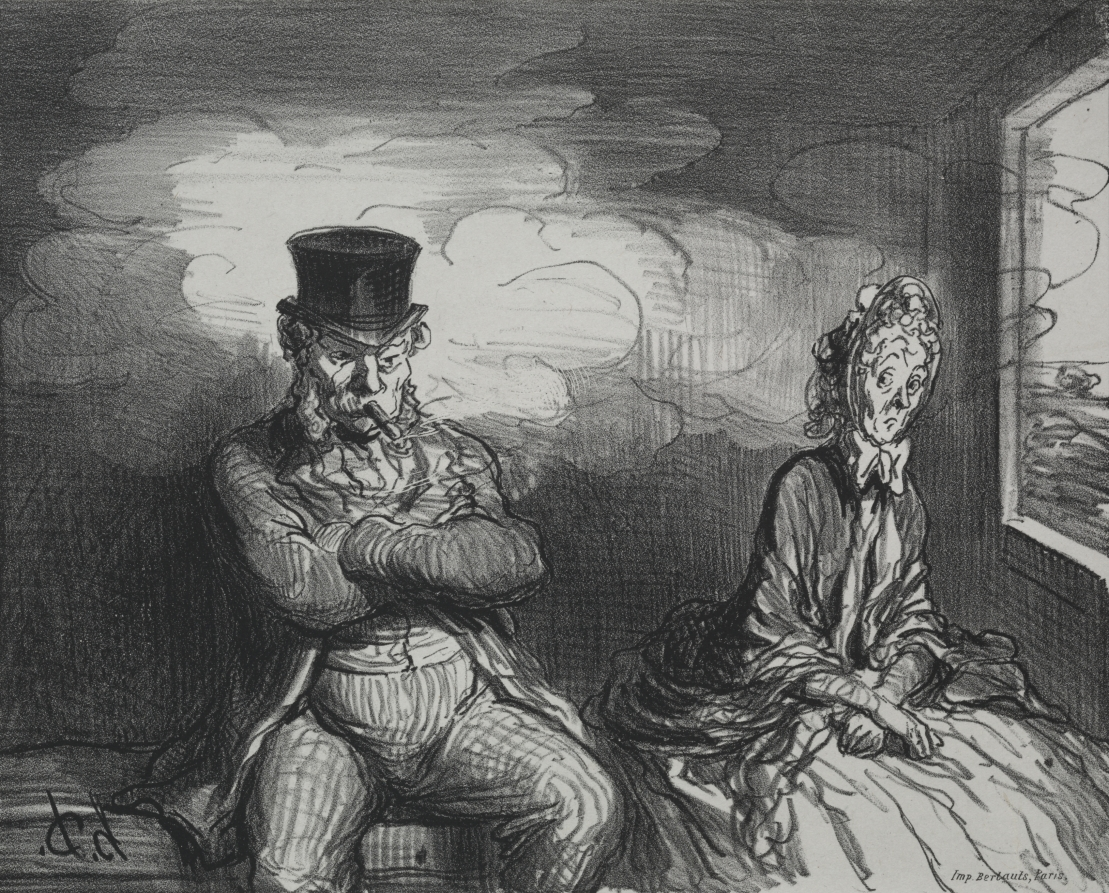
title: On the Train: A Pleasant Companion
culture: France, 19th century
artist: Honoré Daumier (French, 1808–1879)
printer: Bertauts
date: 1862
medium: lithograph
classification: Print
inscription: Lowe right corner of the image, in stone: Imp. Bertauts, Paris.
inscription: Upper margin, in pencil: LD 3252 ; printed: Souvenirs d'Artistes / 361 ; below image, printed: _En Chemin de Fer _ Un Voisin agréable ; lower margin, in pencil: v633v / 150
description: This print was published both in the journal Le Boulevard (September 21, 1862) and in the album Souvenirs d’Artistes (plate 361).